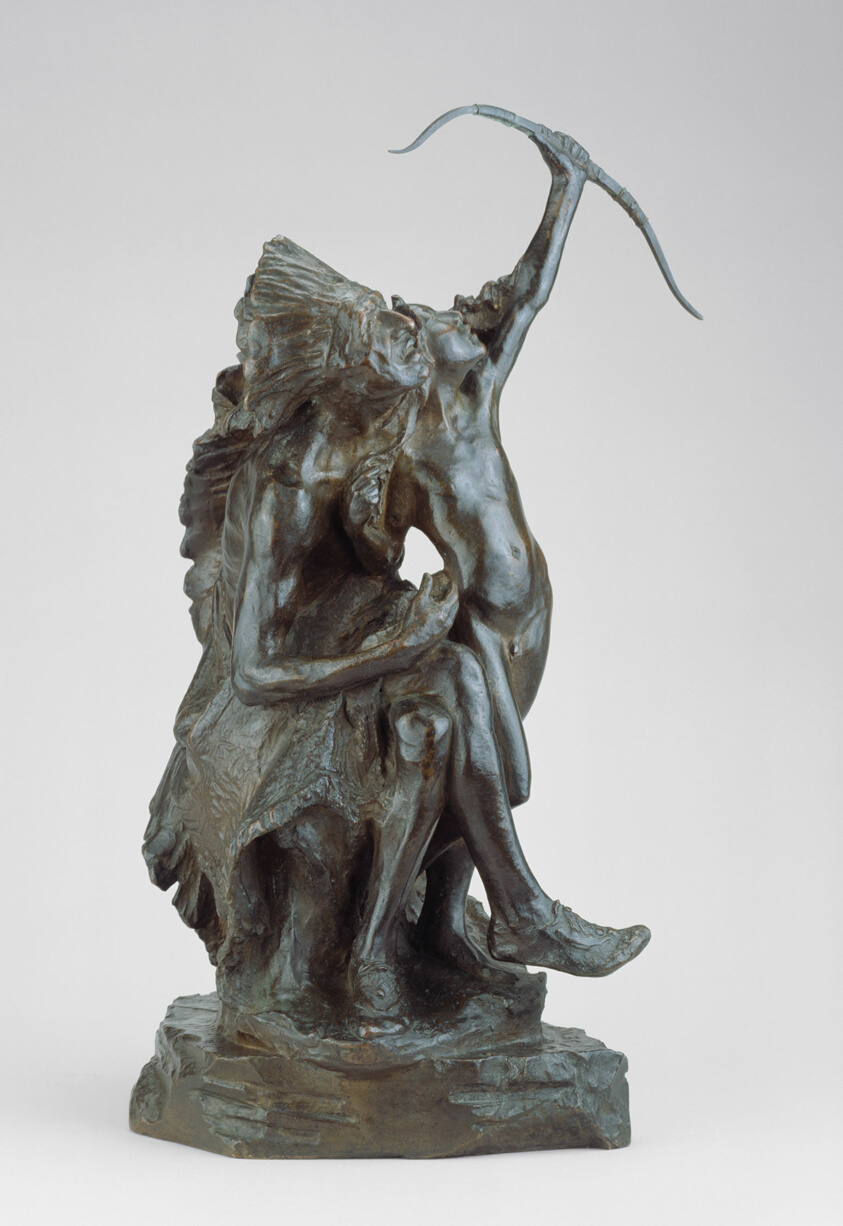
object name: Sculpture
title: The Vow of Vengeance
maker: Hermon Atkins MacNeil (American, 1866–1947)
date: 1894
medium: Bronze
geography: United States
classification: sculpture; american arts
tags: Chicago, people, portraits